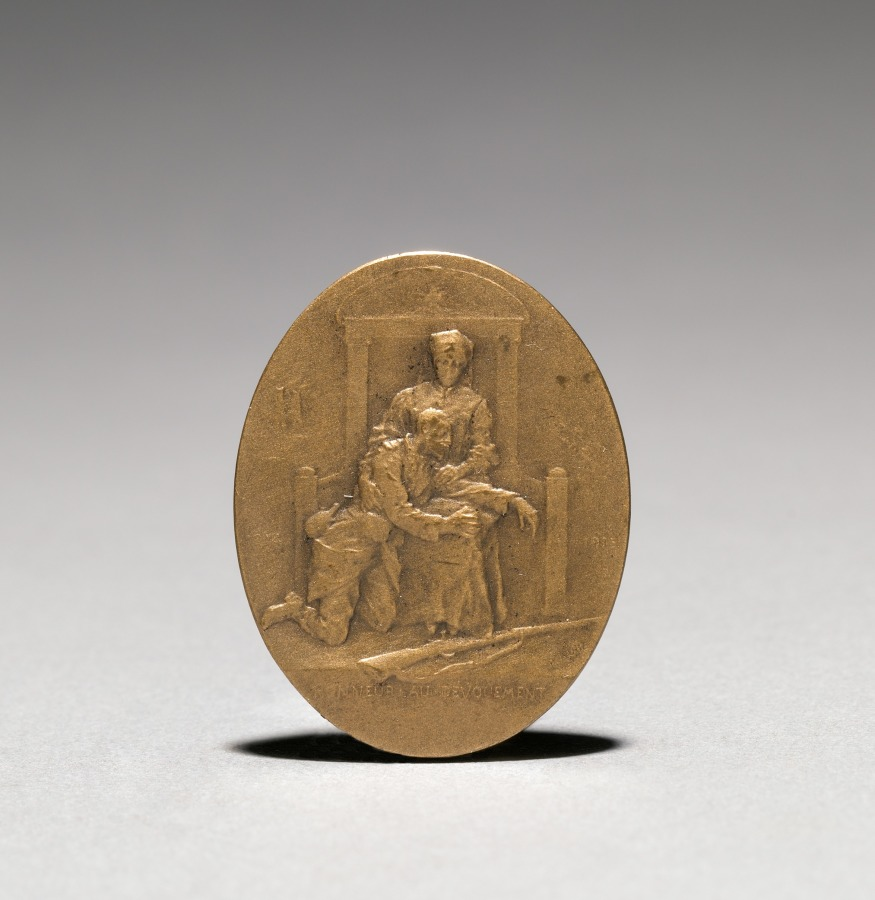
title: Medallion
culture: France, 19th-20th century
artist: Jean Paul Aube (French, 1837–1916)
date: 1915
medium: bronze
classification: Metalwork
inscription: "Honneur au devouement" (honor to self sacrifice); inscribed: "P. Aube."